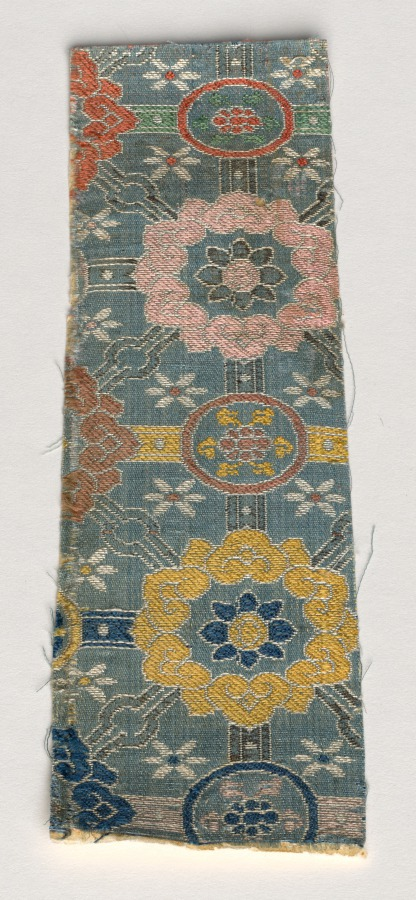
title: Textile Fragment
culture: Japan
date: 1800s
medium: silk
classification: Textile